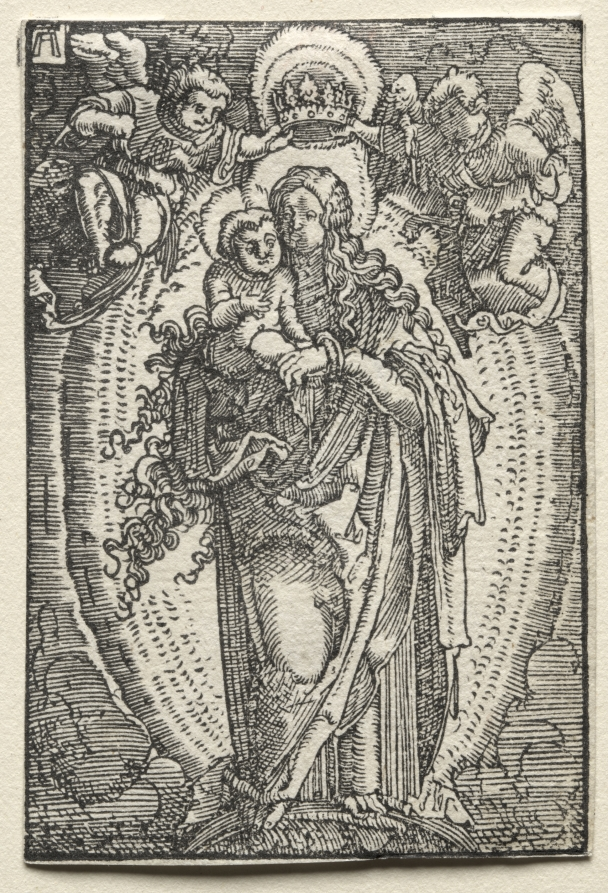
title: The Fall and Redemption of Man: The Virgin as Queen of Heaven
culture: Germany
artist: Albrecht Altdorfer (German, c. 1480–1538)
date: c. 1515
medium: woodcut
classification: Print